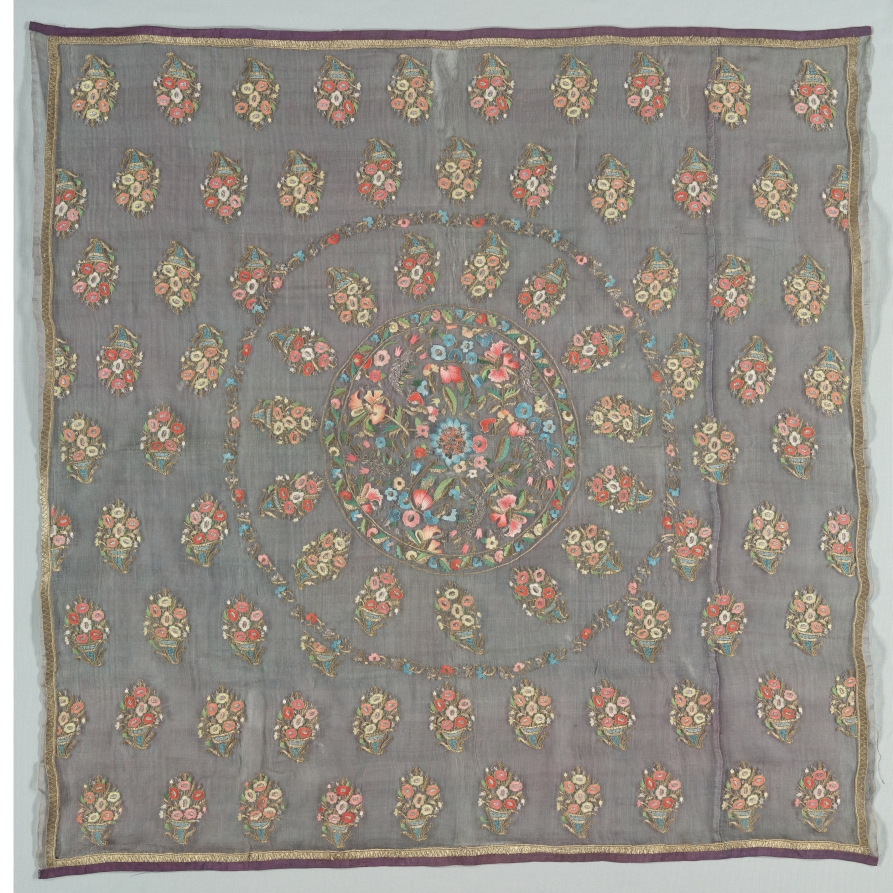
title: Turban cover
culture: Turkey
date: 1700s-early 1800s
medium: plain weave: silk; embroidery, double-running stitch: silk, gilt- and silver-metal thread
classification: Embroidery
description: This exceptionally fine, diaphanous silk turban cover represents the highest quality professional embroidery. Shiny gilt- and silver-metal thread and at least ten colors of silk thread—including newly fashionable pastel tones—create three-dimensional blossoms in the central roundel and multicolored cornucopias on the lavender silk ground. In Turkey, square cloths embroidered with one or two concentric circles in the center of floral fields were generally used to cover stored turbans, a function well served by this elegant cover with weighted golden borders.